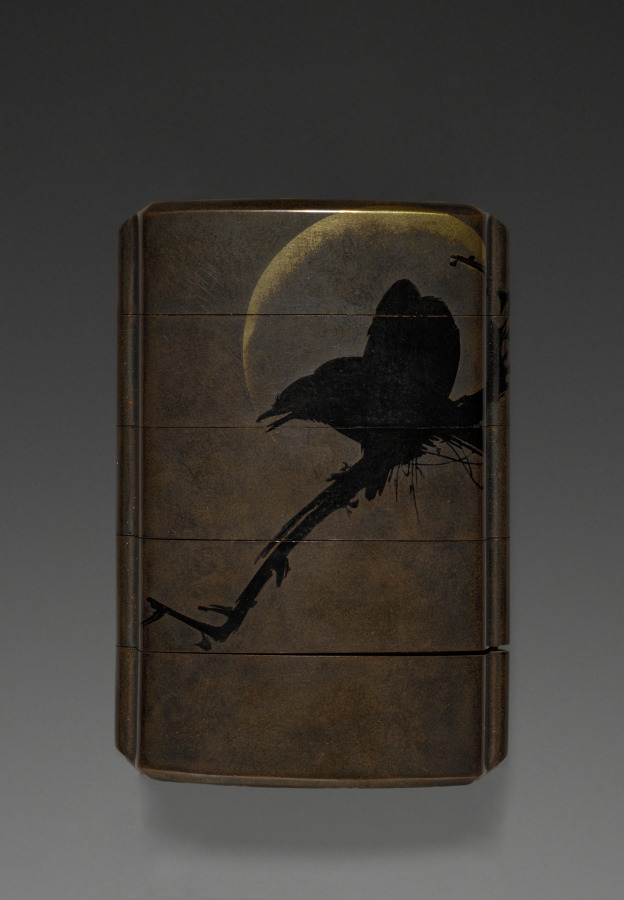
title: Inrō with Crows in Moonlight and Egrets in Snow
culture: Japan, Edo period (1615–1868)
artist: Koma Kyoryū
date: c. 1772–89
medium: Lacquered wood with sprinkled gold (maki-e)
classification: Lacquer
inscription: Signed: 古満巨柳作（花押）